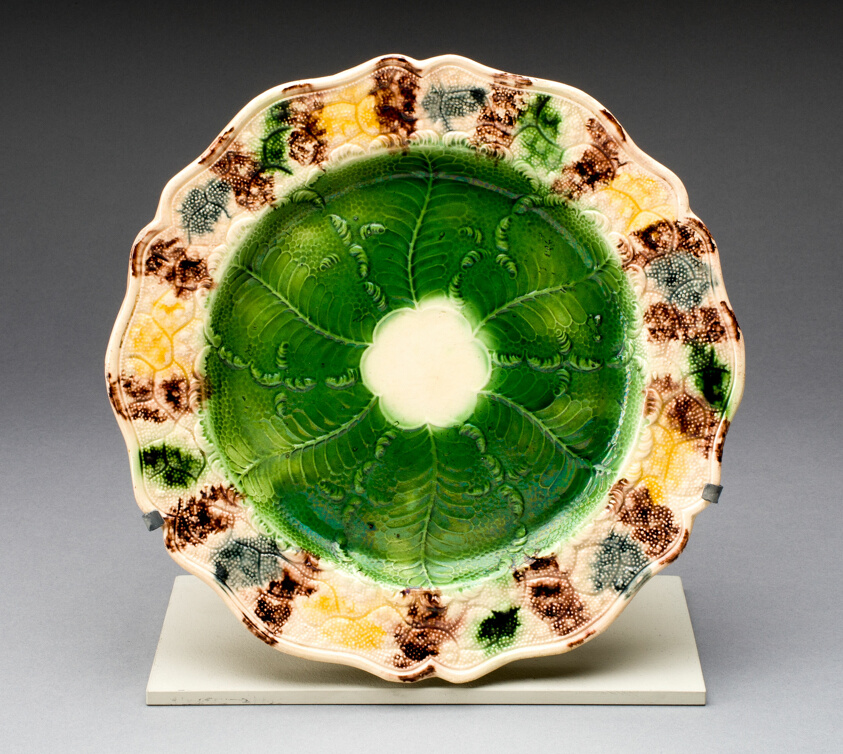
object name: Ceramics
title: Plate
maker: Staffordshire, England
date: 1760/75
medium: Lead-glazed earthenware (creamware)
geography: Staffordshire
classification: plate (general, dish); dish (vessel); creamware; lead-glazed earthenware; ceramics; european decorative arts; earthenware